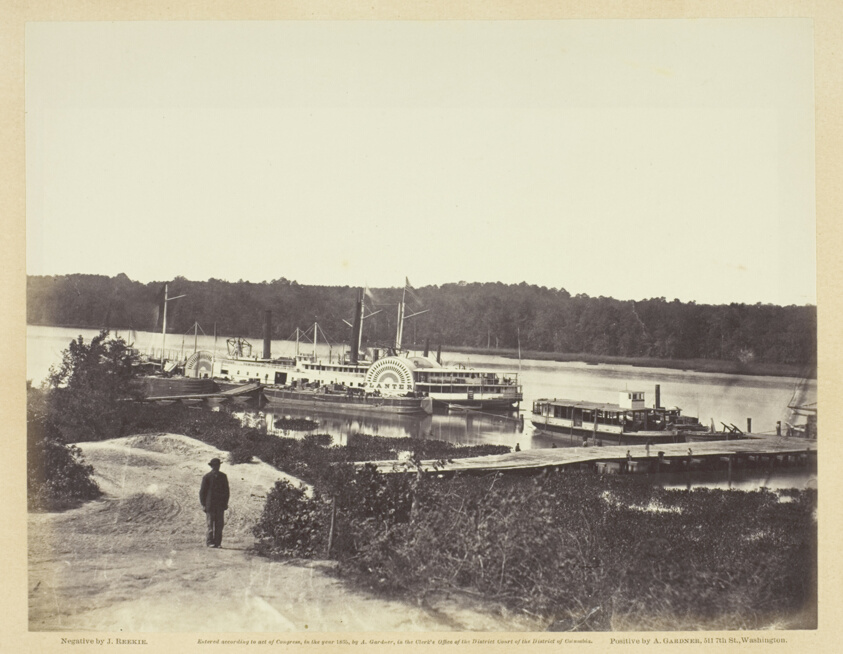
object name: Photograph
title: Medical Supply Boat, Appomattox Landing, Virginia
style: 19th century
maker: John Reekie (American, active 1861–1865)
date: January 1865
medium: Albumen print, pl. 72 from the album "Gardner's Photographic Sketch Book of the War, Volume II" (1866)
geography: United States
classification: albumen silver print; photographic process; photography; photograph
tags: Collected by Hugh Edwards, Gardner's Photographic Sketch Book